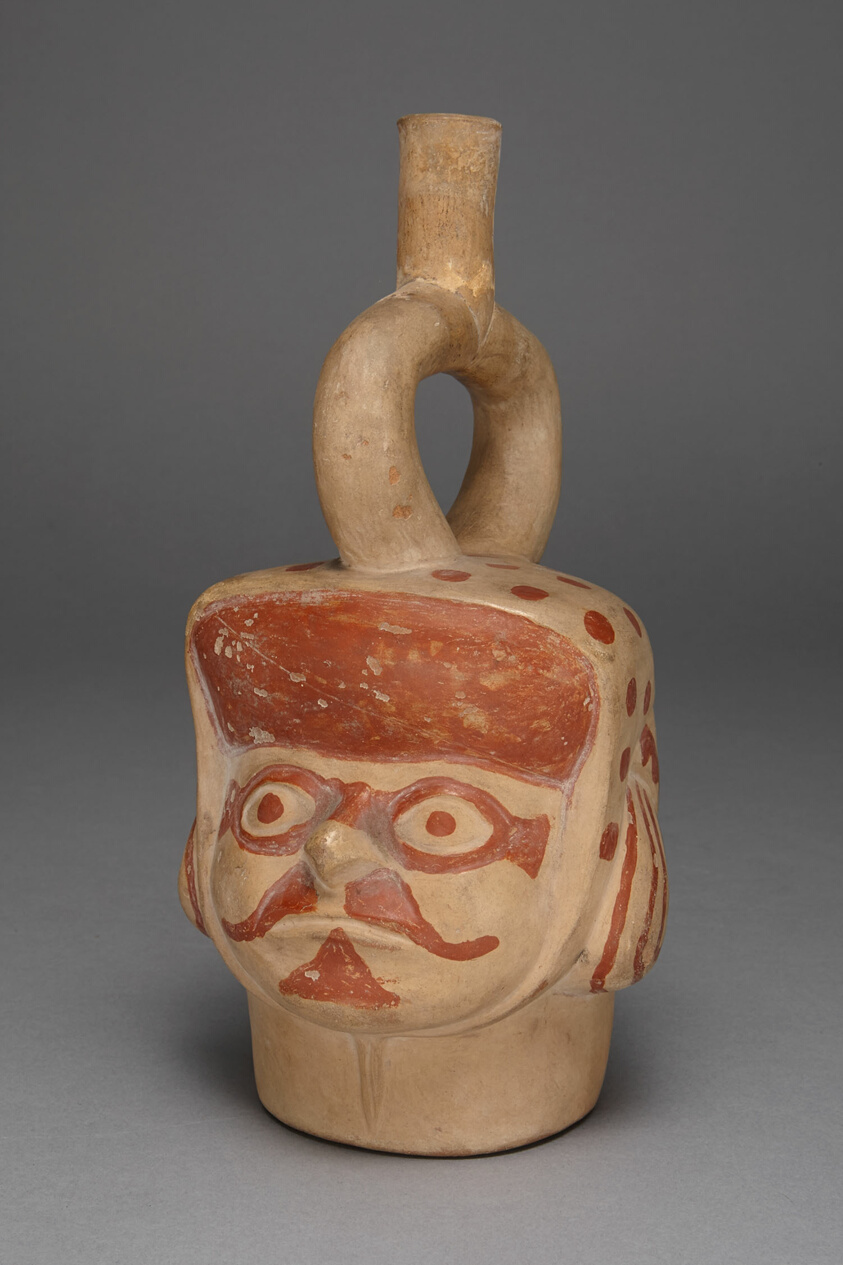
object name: Vessel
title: Vessel in Form of a Masked Head with a Mustache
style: moche, mochica, early intermediate period, Pre-Columbian, americas, Arts of the Americas, andean, andes, south american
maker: Moche (North coast, Peru)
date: 100 BCE–500 CE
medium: Ceramic and pigment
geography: Moche Valley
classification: earthenware; ceramics; vessel; art of the americas